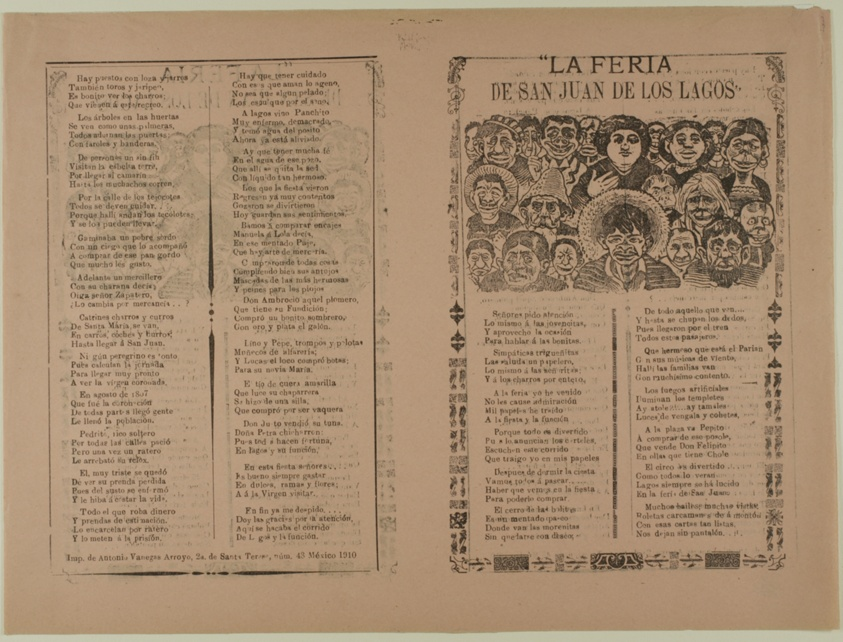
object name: Print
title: The San Juan de los Lagos Fair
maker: José Guadalupe Posada (Mexican, 1852-1913)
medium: Relief print on paper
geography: Mexico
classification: relief etching; print; prints and drawing